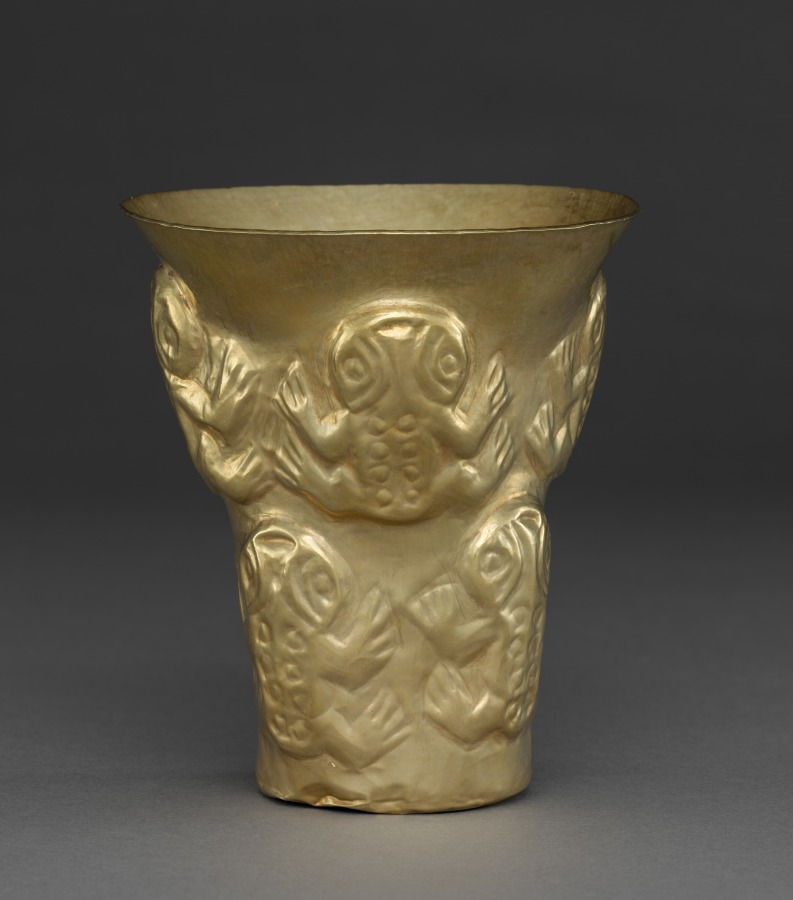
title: Beaker with Frogs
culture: Central Andes (Peru), Lambayeque (Sicán) people, 10th century-12th century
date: 900–1100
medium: gold, hammered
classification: Metalwork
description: This beaker was created by an artist of the Lambayeque culture of Peru's north coast. High-relief frogs grace the surface, which has a dramatically flaring rim as well as a silvery color, the result of silver in the alloy. If such beakers were used in life—that is, not created exclusively for the lavish tombs in which they have been found in quantities—they may have figured in feasting events that were central to late pre-Hispanic political, social, and religious life.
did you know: This beaker was probably formed using a single sheet of metal over a wooden form.